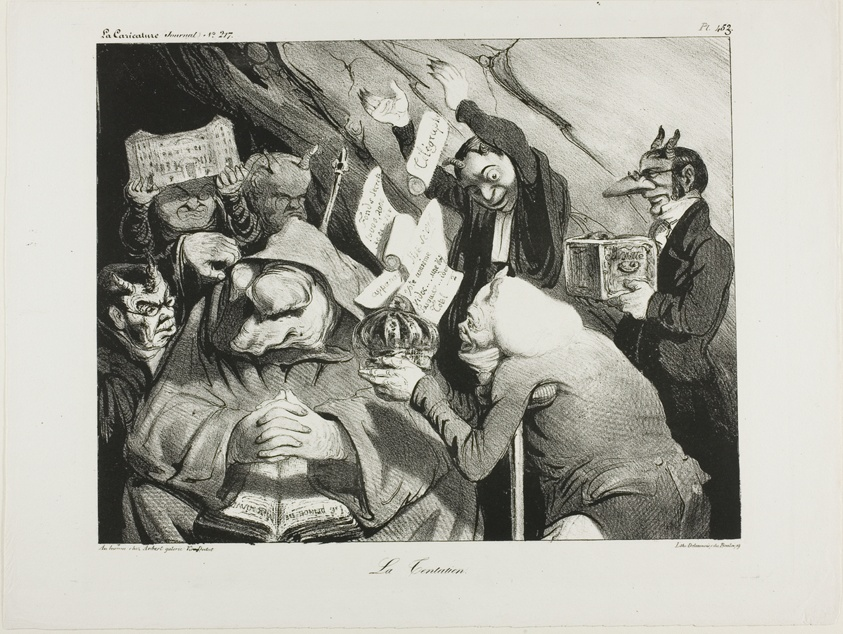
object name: Print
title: Temptation, plate 453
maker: Honoré Victorin Daumier; French, 1808-1879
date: 1835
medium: Lithograph in black on off-white wove paper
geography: France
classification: lithograph; print; prints and drawing